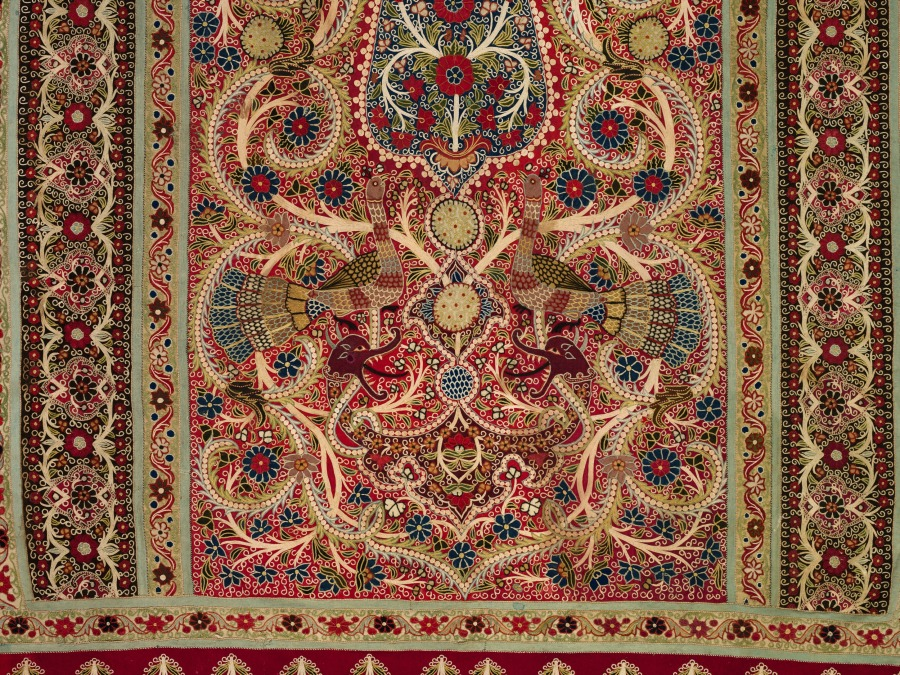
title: Tent Wall Panel(?)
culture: Iran, Rasht, Qajar period (1779-1925)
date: 1800s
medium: Wool: inlaid work; silk: embroidery, chain stitch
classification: Embroidery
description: Elaborate arched panels with multiple borders similar to this textile formed the mosaic-like interior walls of imperial tents. Here, the field is dominated by a richly decorated cypress tree above peacocks and dragon heads on an ornate foliate ground. We look upon the gardenscape through a niche (mihrab) formed by this foliage. Bright white silk “pearl” outlines, vines, and ringlets in chain-stitch embroidery enliven the pattern on contrasting colors of fulled wool. Internationally fashionable botehs, or paisleys, decorate the outer red borders.This technique has been referred to by many different names including: Rasht work, Resht work, Rashti-duzi, Rachti-douzi, embroidery applique, mosaic embroidery, piecework, patchwork, embroidery brocade, and inlaid patchwork. Many of these terms are to various degrees inaccurate descriptions of this technique. Perhaps the most practical term is Rasht work, named for the town in Iran where the technique was popularized. It begins as a ground of felted plain weave wool. Desired shapes are then punched out of the ground with a metal die and hammer. The same is done with wool of an alternating color. The edges of the different cut pieces are then embroidered together into various designs using a silk chain stitch (golab-duzi). Although this piecework technique was recorded in Iran in the 1670s, most examples survive from the 19th century, when foreigners praised them as “really [the] most beautiful embroidery.” The technique appears in furnishing fabrics, and horse covers, as well as imperial portraits, including one depicting the Qajar monarch Fath ‘Ali Shah, who ruled in 1797–1837. Sometime after leaving the workshop this panel experienced moth damage; small patches can be seen throughout.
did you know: Generally, Rasht work was made by men. Boys handled the delicate embroidering while older men designed cartoons and punched the wool designs.